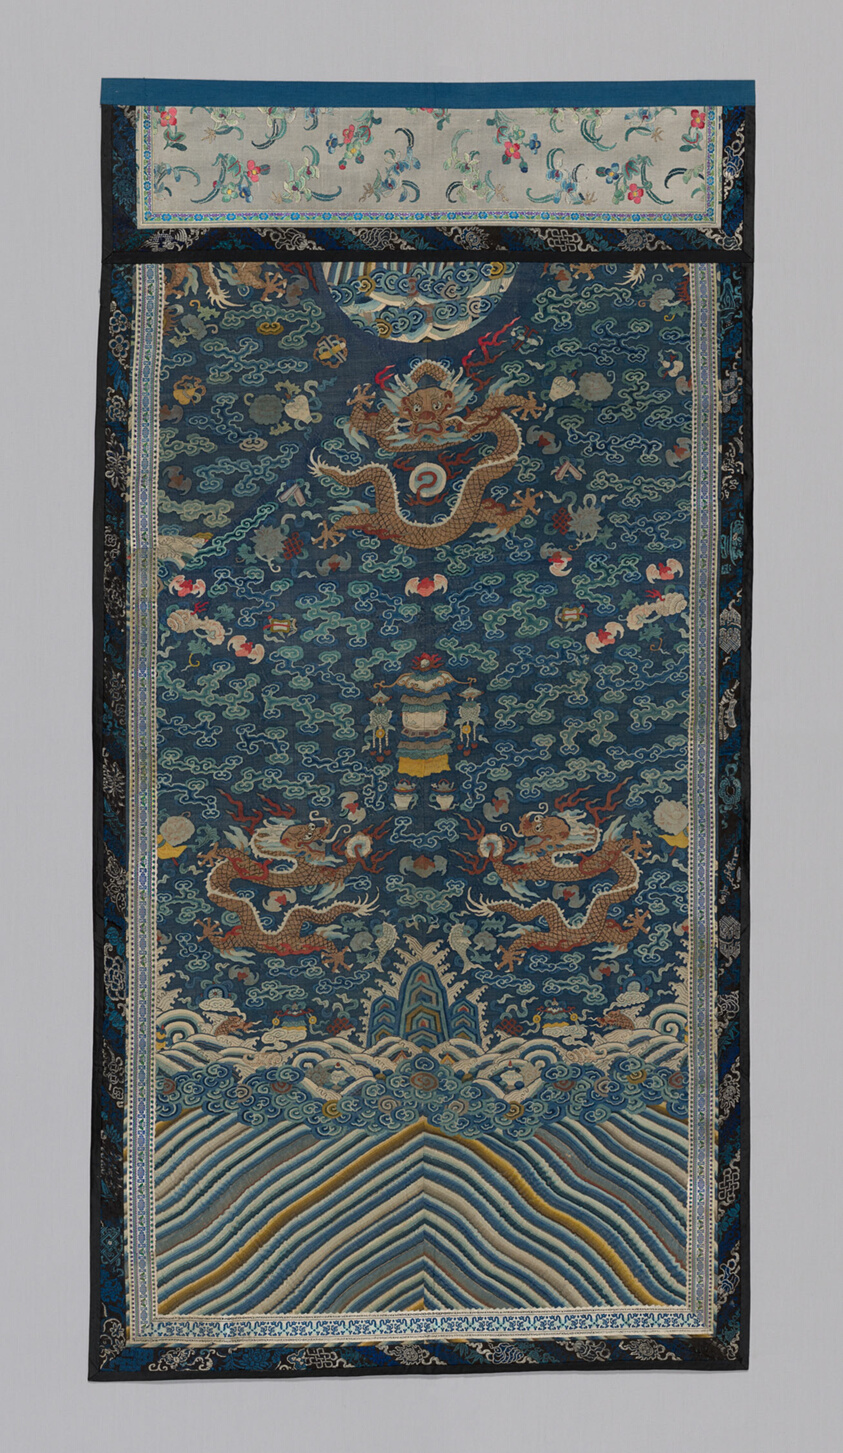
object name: Textile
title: Panel (Furnishing Fabric)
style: qing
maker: Manchu (China)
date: Qing dynasty (1644–1911), 1875/1900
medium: Center: silk and gold-leaf-over-lacquered-paper-strip-wrapped silk, slit tapestry weave (kossu); painted Side, top, and bottom tapes: silk, plain weave; outer edge tape: silk; top panel: silk, 1:1 simple gauze weave; embroidered with silk in stem stitches; edged with cotton; glazed; lined with cotton, plain weave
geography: China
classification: textile; weaving - printed; furnishing textile